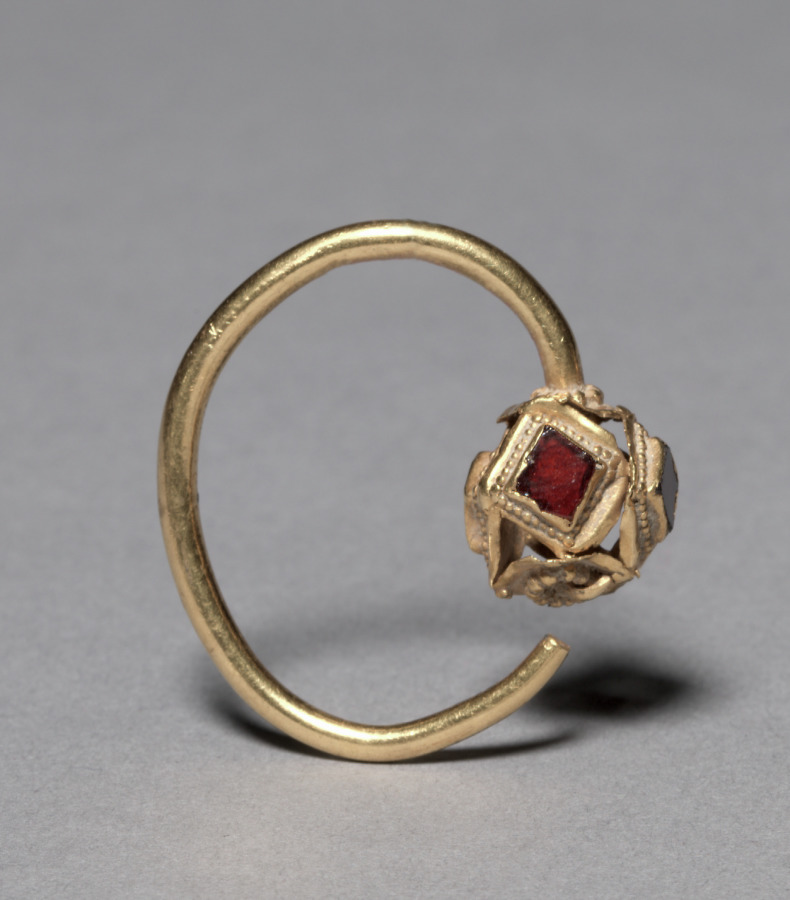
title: Earring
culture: Ostrogothic, Migration period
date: 400s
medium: gold with garnets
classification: Jewelry